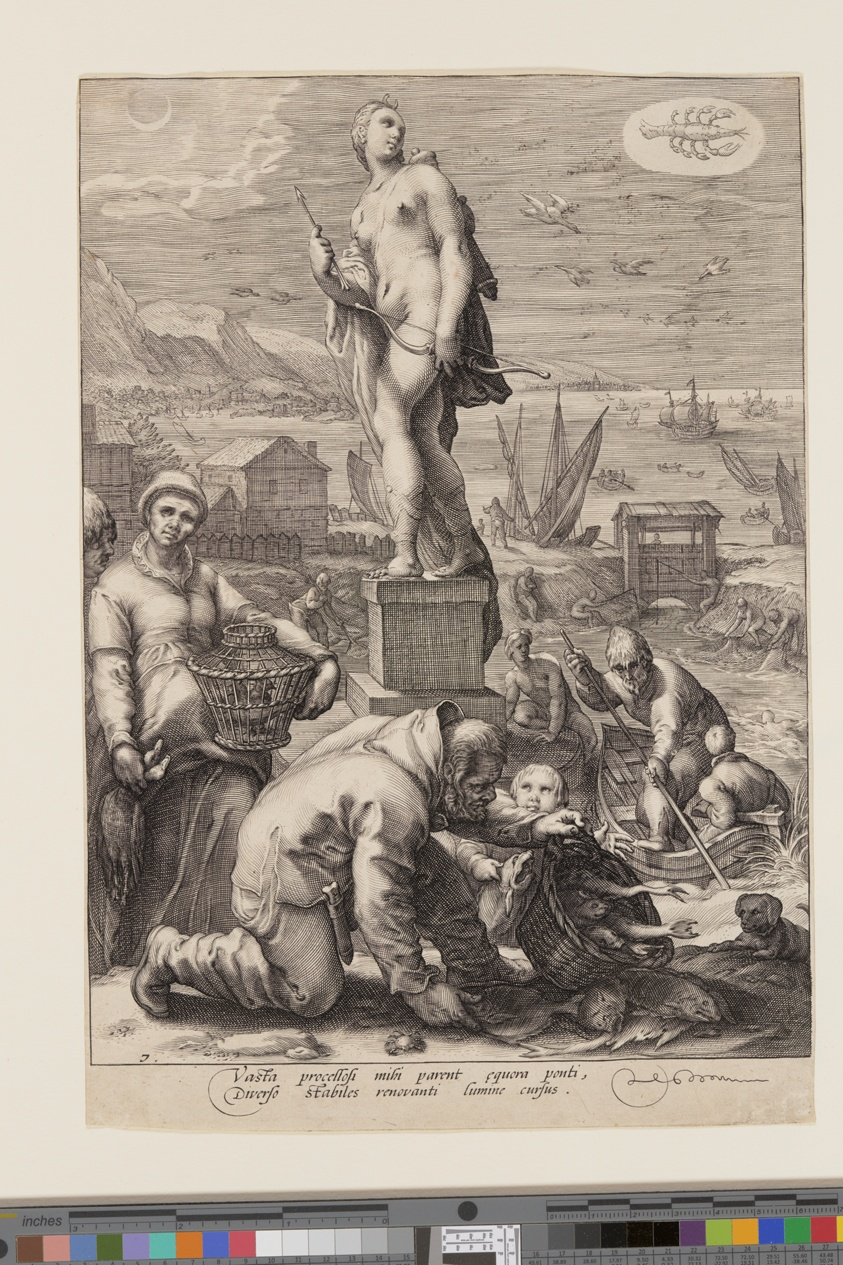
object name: Print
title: Diana Presiding over Navigation and Fishing, from Seven Planetary Gods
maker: Jan Saenredam (Dutch, 1565–1607); after Hendrick Goltzius (Dutch, 1558–1617)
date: 1596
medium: Engraving on ivory laid paper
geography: Netherlands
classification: engraving; paper; print; prints and drawing